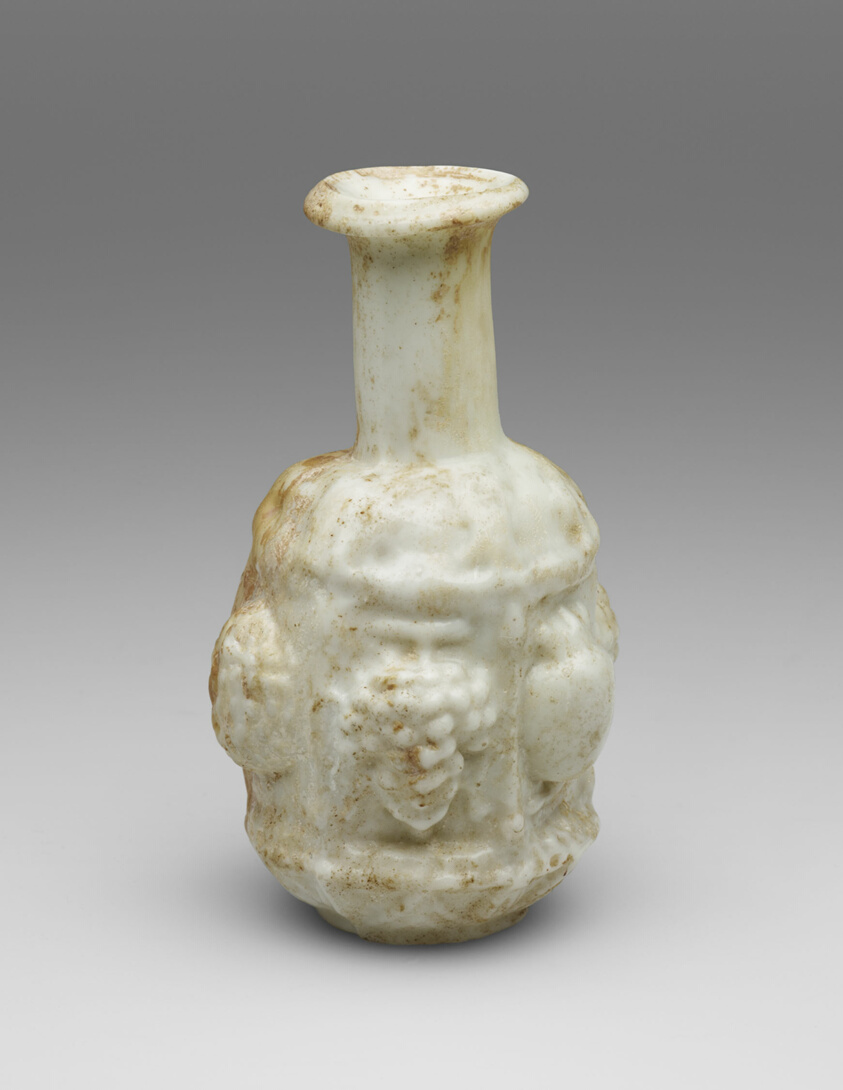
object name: Vessel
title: Bottle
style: roman (ancient, style or period), ancient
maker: Roman; coast of Syria or Palestine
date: 1st century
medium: Glass, mold-blown technique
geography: Syria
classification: bottle; glass; vessel; ancient art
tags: containers